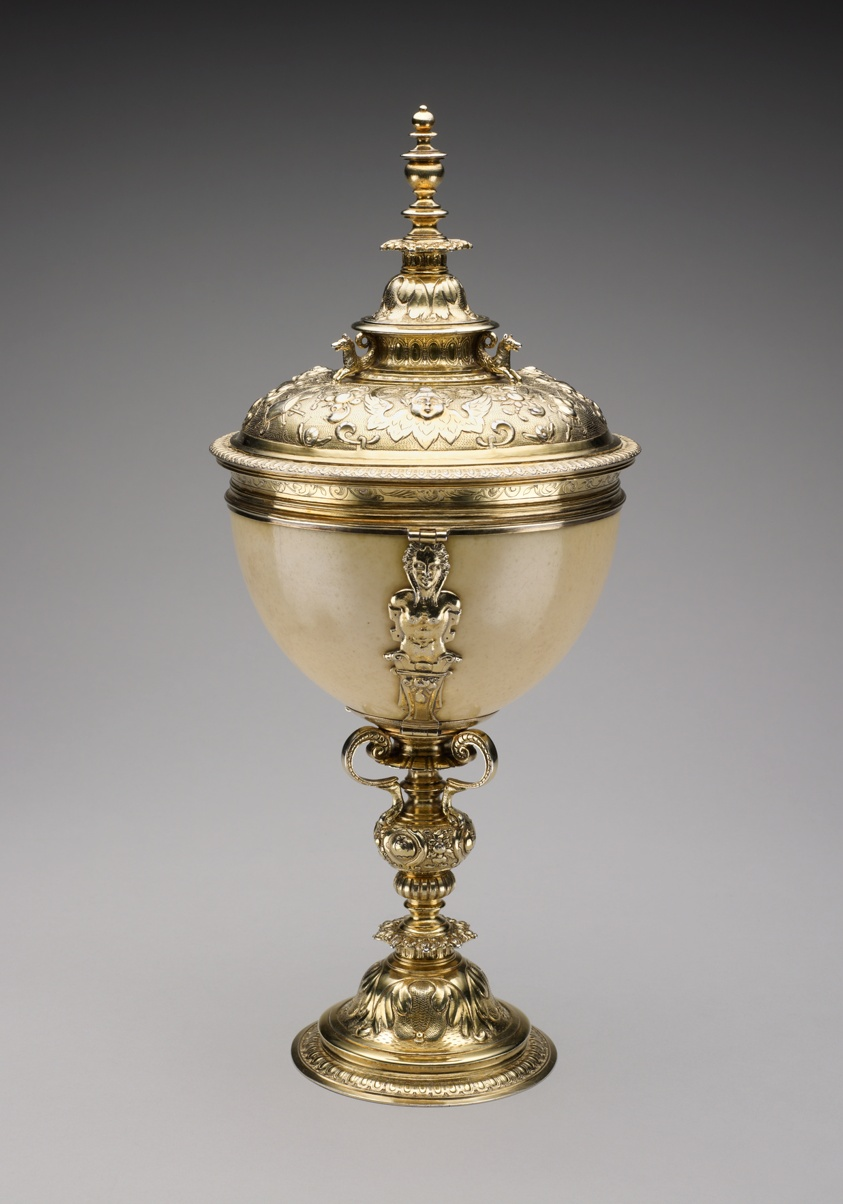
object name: Metalwork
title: Ostrich Cup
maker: John Spilman (English, born Bavaria, died 1626); London, England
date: 1590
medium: ostrich egg and silver gilt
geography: London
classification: decorative object/ornament; metalwork